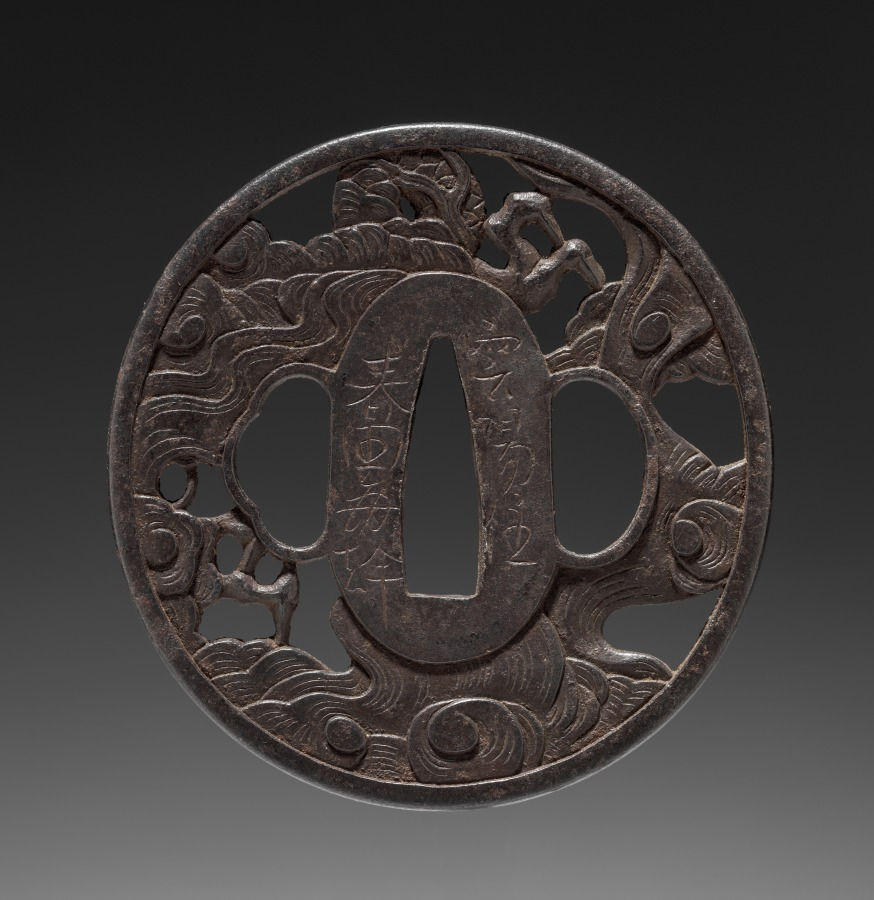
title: Sword Guard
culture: Japan, Edo period (1615–1868)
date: mid-1800s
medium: iron (Shoami type)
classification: Arms and Armor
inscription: signed "Haruta Tsunemoto, residing in Izumo province."